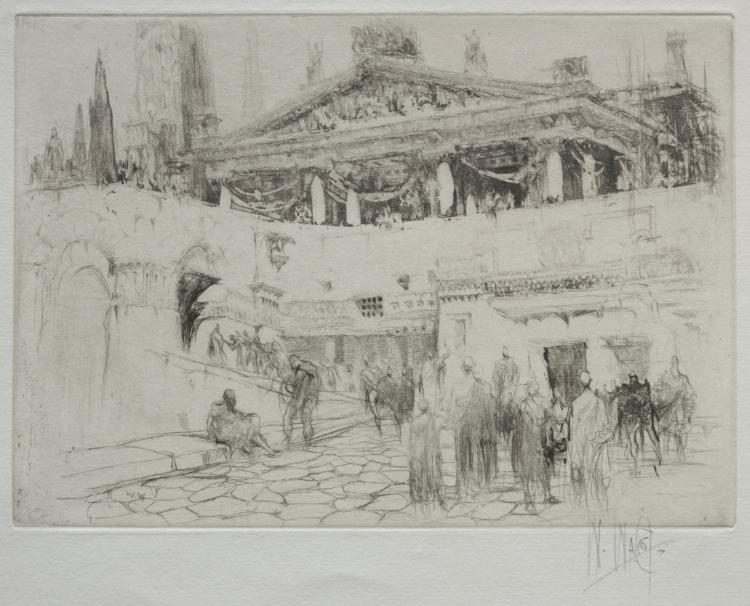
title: The First Wooden Temple of Jupiter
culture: England, 20th century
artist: William Walcot (British, 1874–1943)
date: 1918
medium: etching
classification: Print